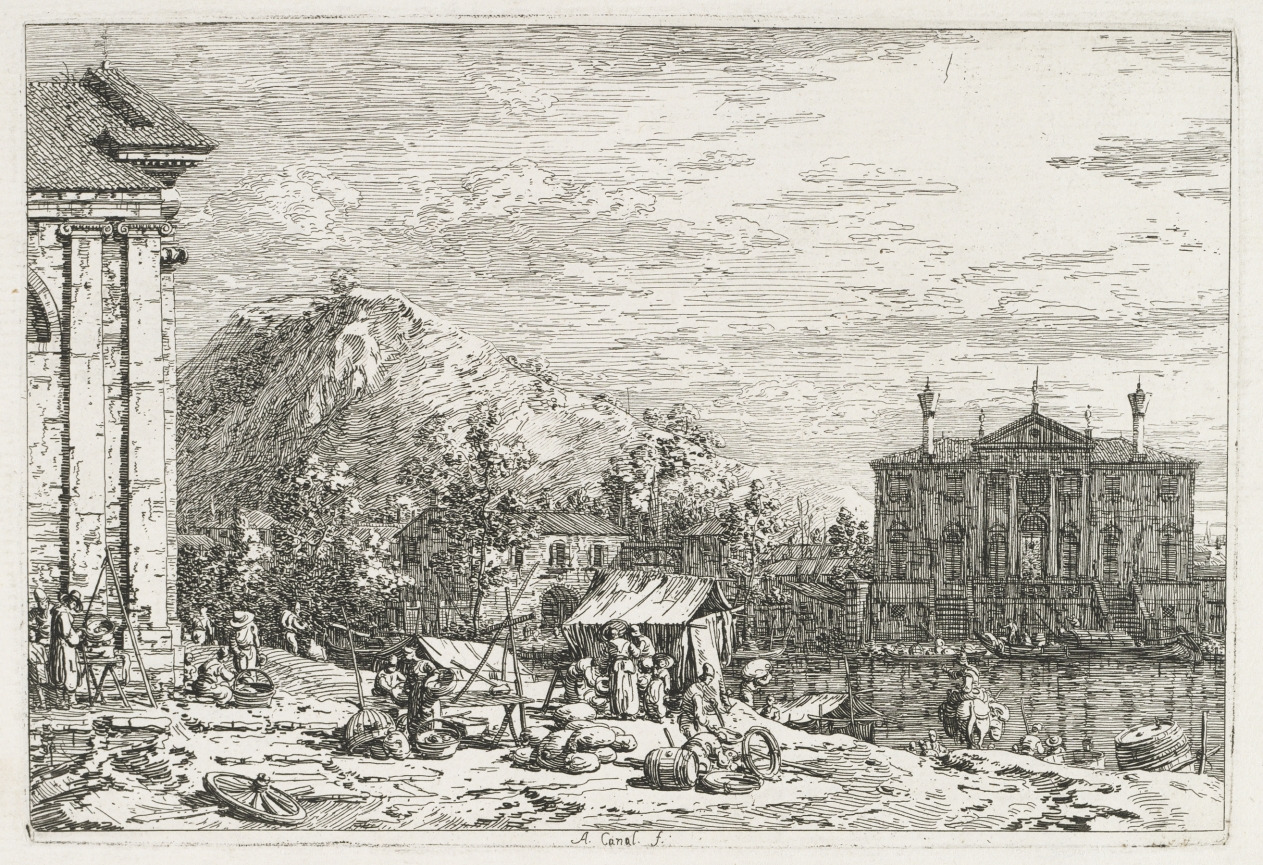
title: Views: A City Beyond a River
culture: Italy, Venice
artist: Antonio Canaletto (Italian, 1697–1768)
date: 1735–1746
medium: etching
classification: Print